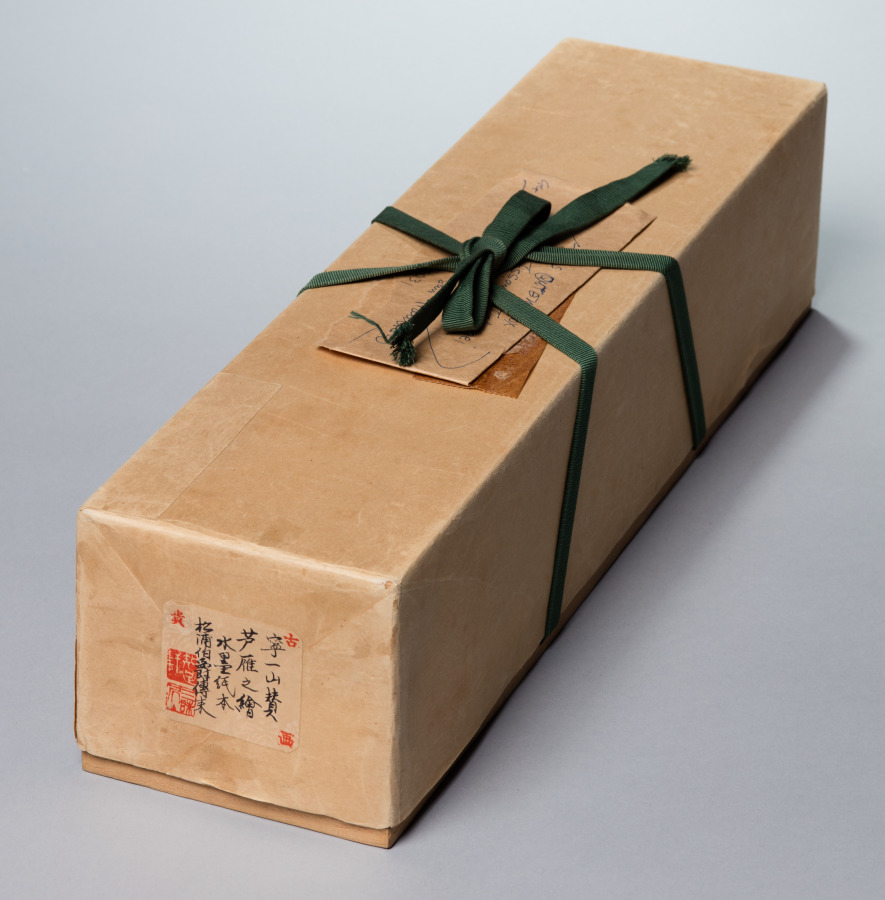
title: Reeds and Geese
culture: Japan, Kamakura period (1185–1333)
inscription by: Yishan Yining [Issan Ichinei] (Chinese, 1247–1317)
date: 1314–17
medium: hanging scroll; ink on paper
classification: Painting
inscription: signed: Issan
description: Reeds and geese has been a common pairing in Chinese literary and visual culture for many centuries. This painting presents the contribution of a Japanese amateur painter, almost certainly a Zen Buddhist monk, to Japan’s fledgling efforts to add the theme to its own cultural vocabulary in the early 1300s. As was customary at the time in Japan, the painter did not sign or seal his work; the inscription, a poem added to the painting by the eminent émigré monk Yishan Yining, along with his signature and seal, was of far greater cultural value. Today, the modestly sized painting has tremendous significance as one of the earliest surviving examples of Japanese ink paintings with reeds and geese.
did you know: Tokyo National Museum owns a copy of this painting made by Kano Gyokusen (1796–1864) when he was 14 years old.